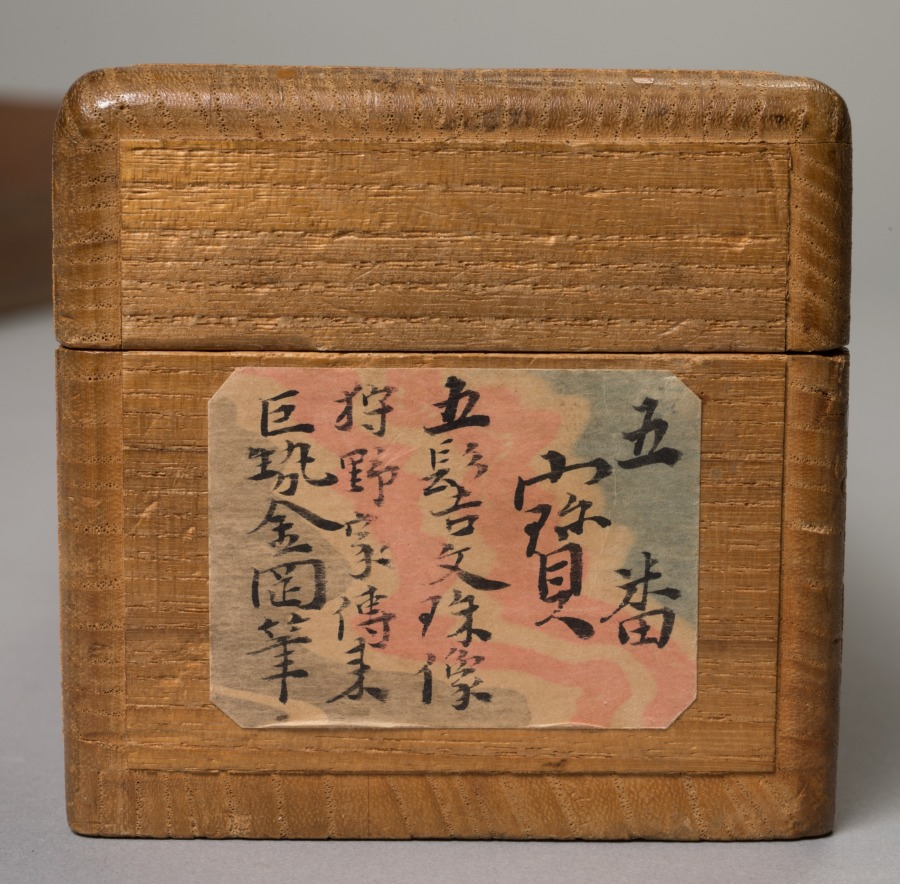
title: Monju with Five Hair Knots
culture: Japan, Kamakura period (1185–1333)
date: late 1200s–early 1300s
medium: Hanging scroll; ink, color, gold, and cut gold on silk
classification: Painting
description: This Buddhist painting shows Monju, Manjushri in Sanskrit, riding a lion. Monju is a bodhisattva, a being who, though enlightened, chooses not to become a Buddha but instead helps others achieve enlightenment. Monju’s youthfulness symbolizes his pure wisdom, unsullied by the world, and his five hair knots represent his vow to keep calamity at bay. The supernatural nature of his lion is emphasized by its hair, every strand painted in gold, as well as by the lotus platforms beneath each of its feet. The boy’s bejeweled body and silk finery is meant to resemble that of an Indian prince.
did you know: This painting is exemplary of the Kamakura period, known for artworks with special attention paid to the realism of images.